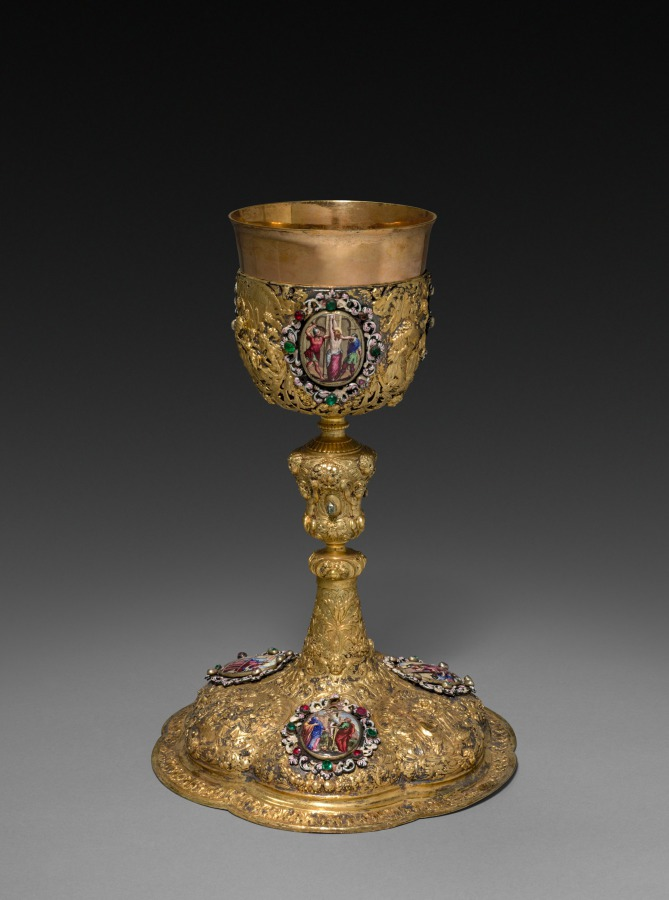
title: Chalice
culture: Switzerland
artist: Thomas Pröll (Swiss)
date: early 1700s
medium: silver gilt with polychrome painted enamels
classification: Metalwork